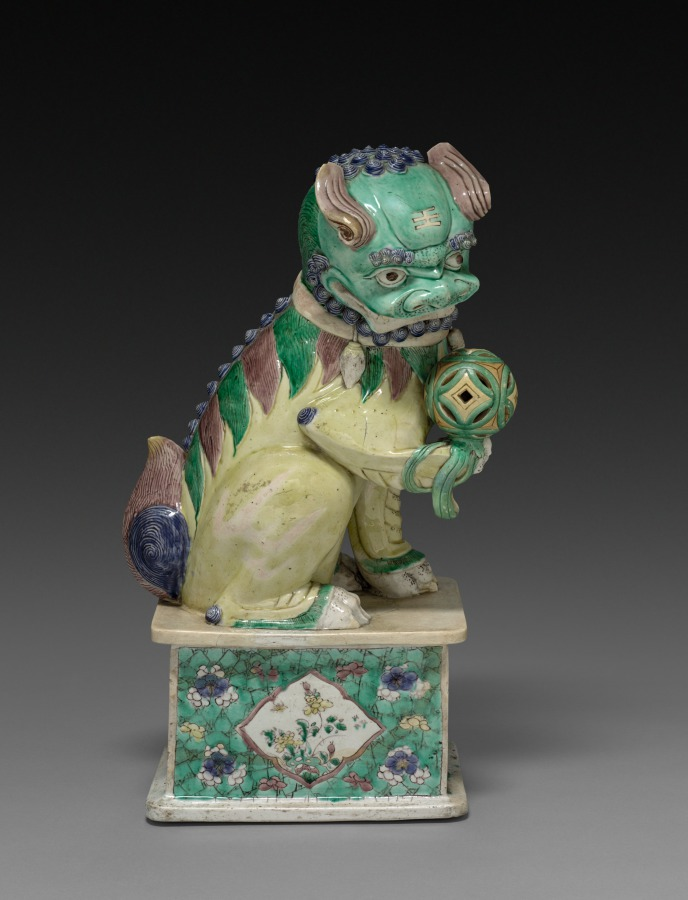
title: Lion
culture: China, Qing dynasty (1644-1911), Kangxi reign (1661-1722)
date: 1662–1722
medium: porcelain with overglaze enamel decoration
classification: Sculpture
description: This porcelain lion is a pair with 1930.642. This lion holding a ball is considered male, while the nurturing female is depicted with a cub. Guardian lions were traditionally placed in front of buildings to protect from harmful spiritual or human forces.